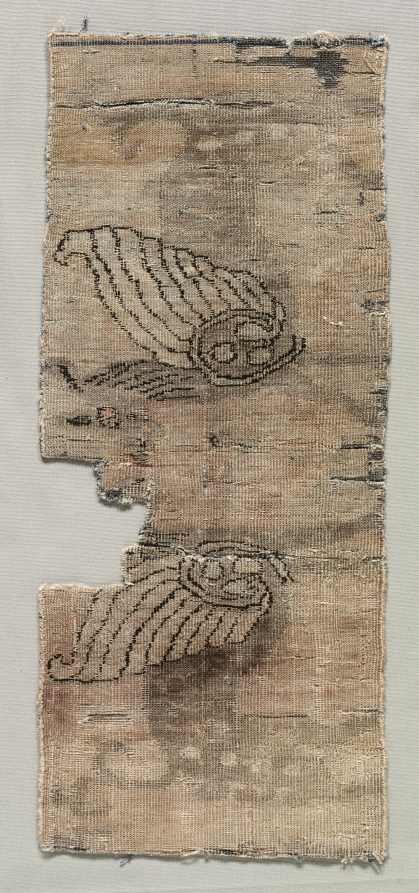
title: Two-faced Carpet Fragment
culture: Iran ?, Seljuq period (1037–1194)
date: 1100s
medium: senna knot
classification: Textile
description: This fragment preserves portions of designs of two faces of a carpet. One design depicts a stylized tulip with part of its mirror image. The opposite side depicts a pair of winged ibexes oriented at right angles to the "tulip" design.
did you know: The tulip symbolizes modesty before God because, when in full bloom, it bows its head.